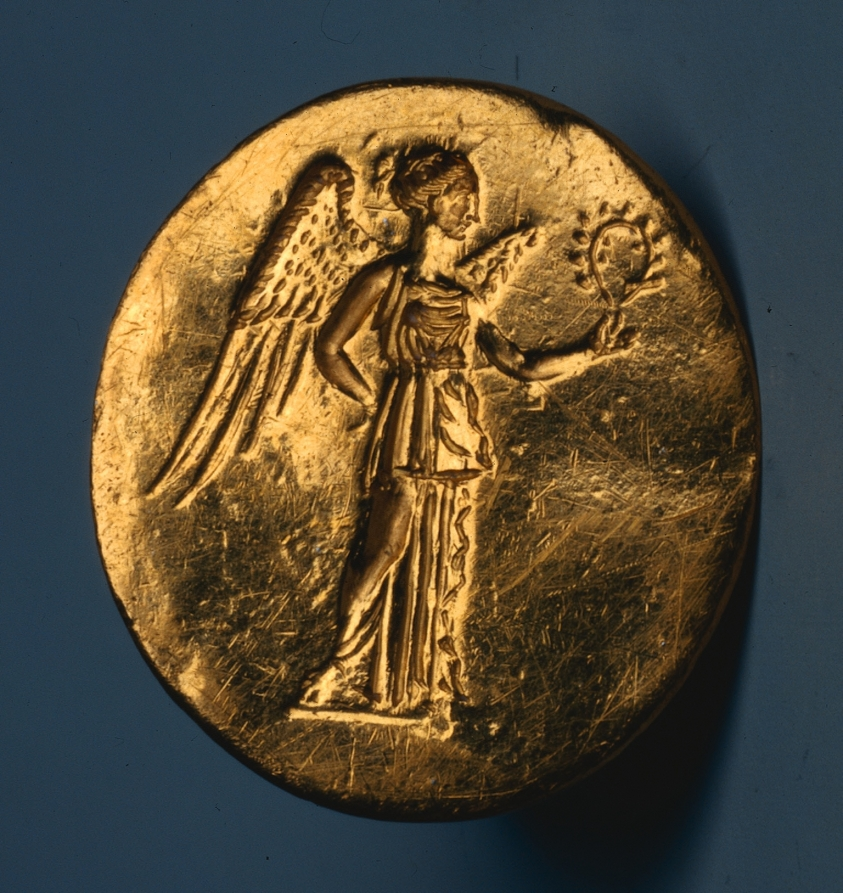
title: Finger Ring with Figure of Nike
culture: Greece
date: 300s BCE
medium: gold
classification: Jewelry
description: The figured carved on the upper portion of this gold ring represents Nike, the Greek goddess of victory. She faces right in contrapposto with one hand behind her back while the other, outstretched, displays a wreath. The goddess is exquisitely engraved, with separately modeled locks of hair and individual feathers on her wings. Engraved rings were worn both as jewelry and as personal signatures, since the engraved image could be pressed to create a seal.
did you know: The ancient Greek pronunciation of Nike is NEE-kay.